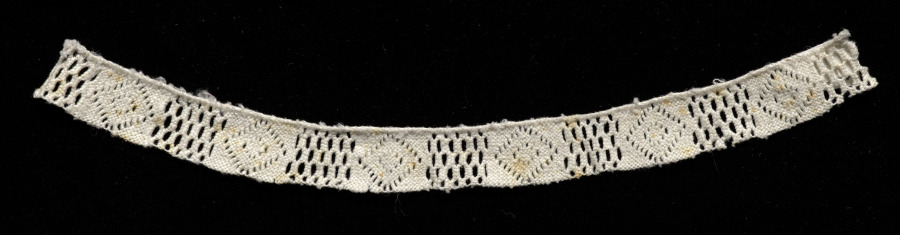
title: Lace Fragment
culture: Italy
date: 1600s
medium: Needle lace (punto avorio or ivory stitch) insertion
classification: Lace